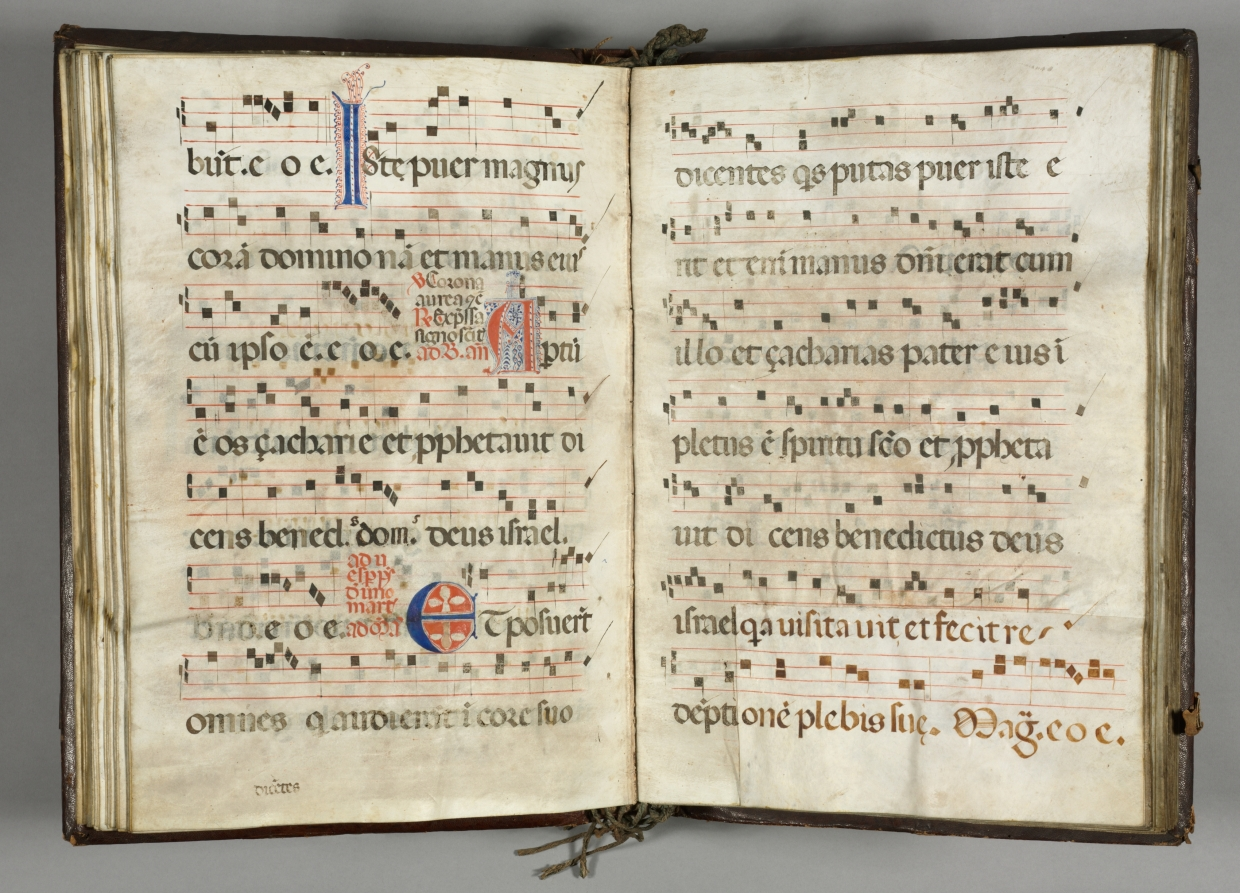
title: Choir Book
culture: Italy, 16th century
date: 1500s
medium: leather binding, copper alloy buckles, lead seal, parchment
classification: Manuscript